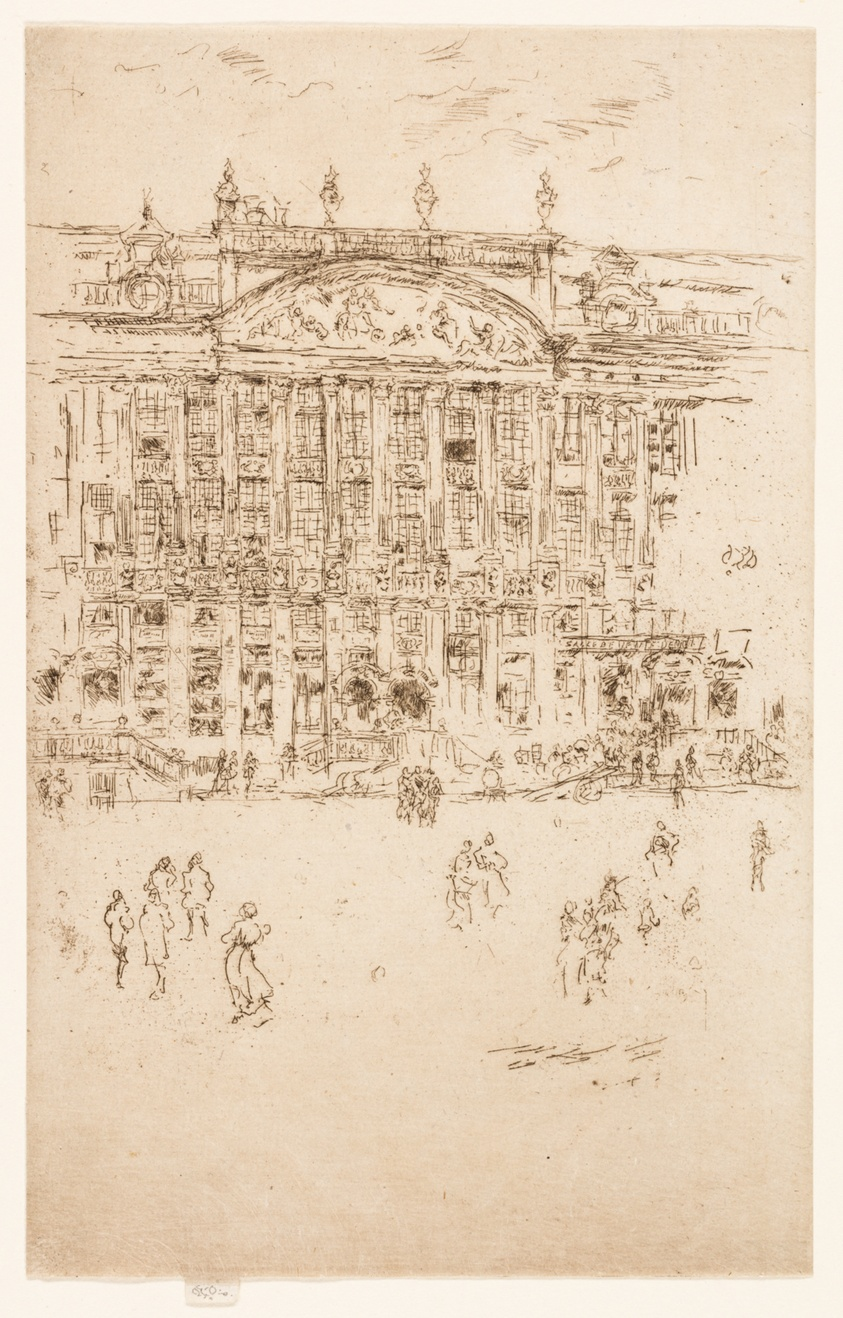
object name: Print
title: Grand' Place, Brussels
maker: James McNeill Whistler (American, 1834-1903)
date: 1887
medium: Etching and drypoint with foul biting in black ink on ivory laid paper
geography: United States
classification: etching; drypoint; print; prints and drawing; foul biting; paper